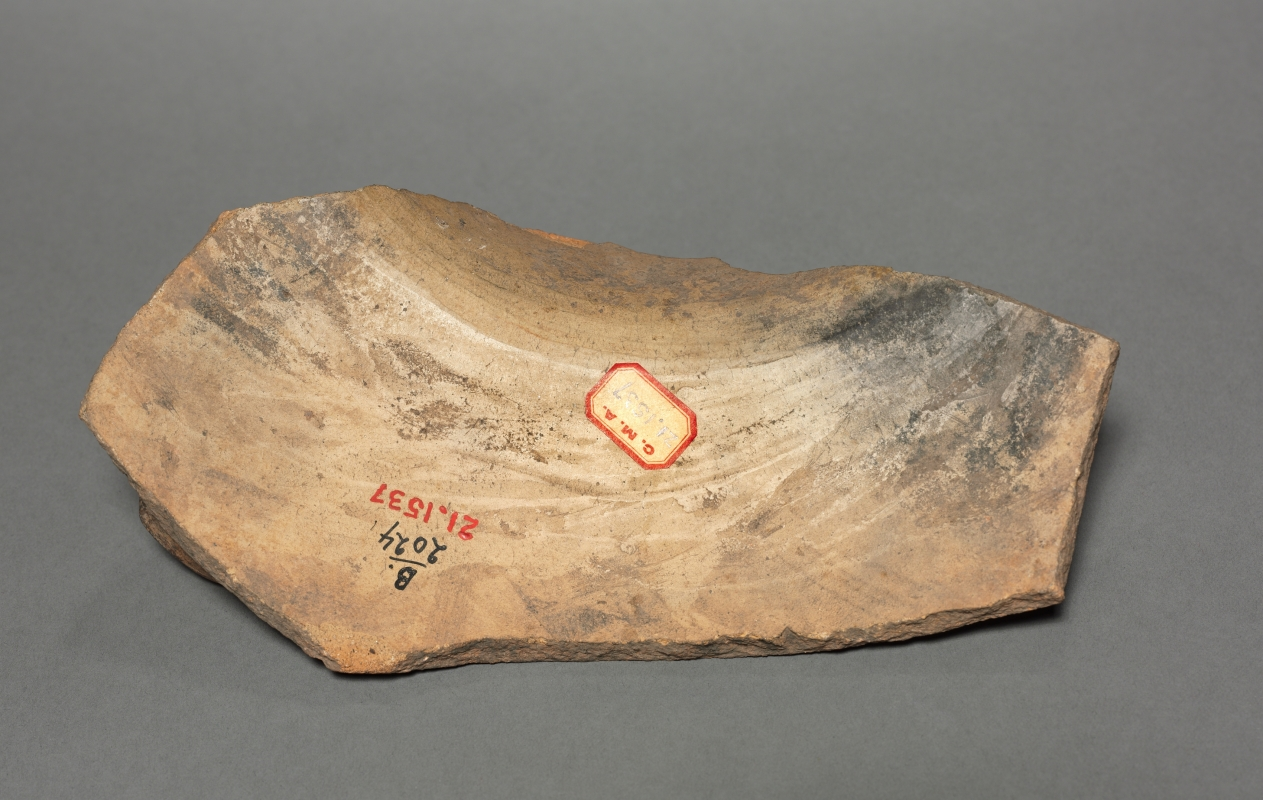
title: Fragment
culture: Peru, Inka, 1400-1532 AD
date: 1400–1532 AD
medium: pottery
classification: Ceramic